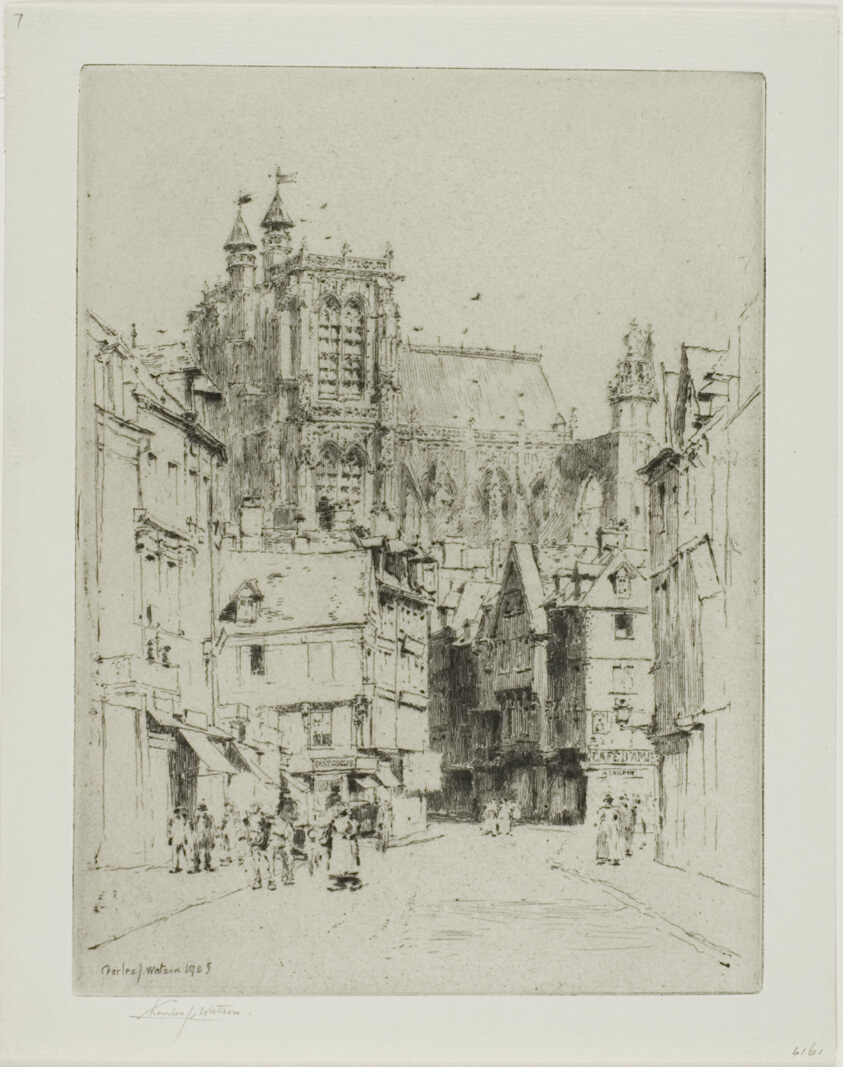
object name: Print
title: Abbéville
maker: Charles John Watson (English, 1846-1927)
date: 1905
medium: Etching in brownish black ink on cream laid paper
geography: England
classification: etching; print; prints and drawing